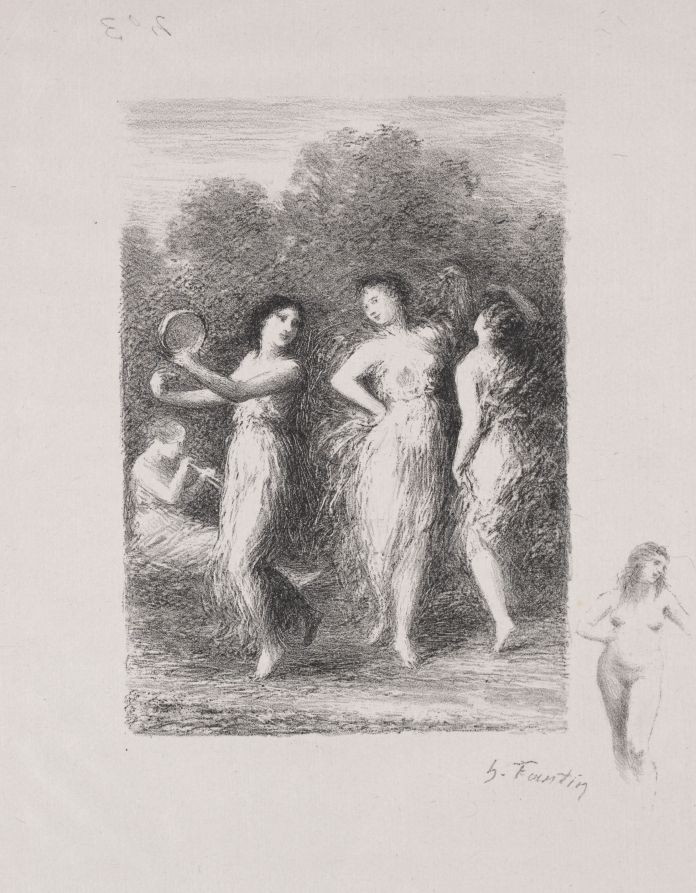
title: La jeune malade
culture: France, 19th century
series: Illustrations for the Poems of André Chénier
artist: Henri Fantin-Latour (French, 1836–1904)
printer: Auguste Clot (French, 1858–1936)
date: 1903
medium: lithograph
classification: Print